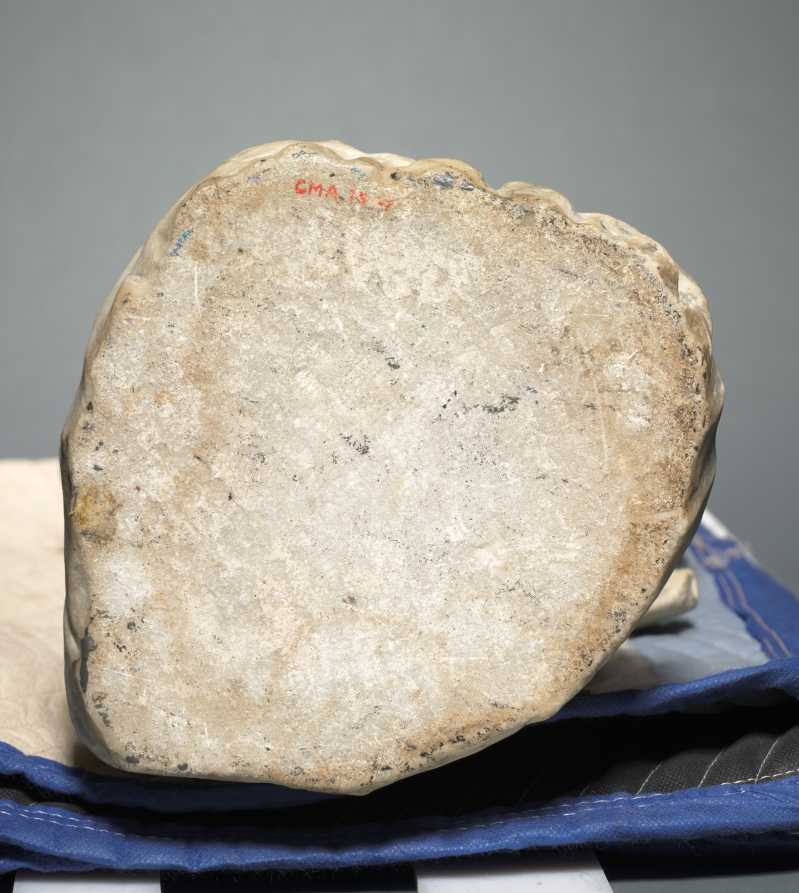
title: Christ Child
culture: Italy, Florence, 15th century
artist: attributed to Michele (di Luca) Marini (Italian)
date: c. 1490–1500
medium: marble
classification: Sculpture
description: This sculpture is an enlarged version of Desiderio da Settignano's figure of about 1460 at the top of his tabernacle in the Church of San Lorenzo in Florence. There are many replicas of Desiderio's work. This example is an especially fine one, undoubtedly intended for the interior of a church.